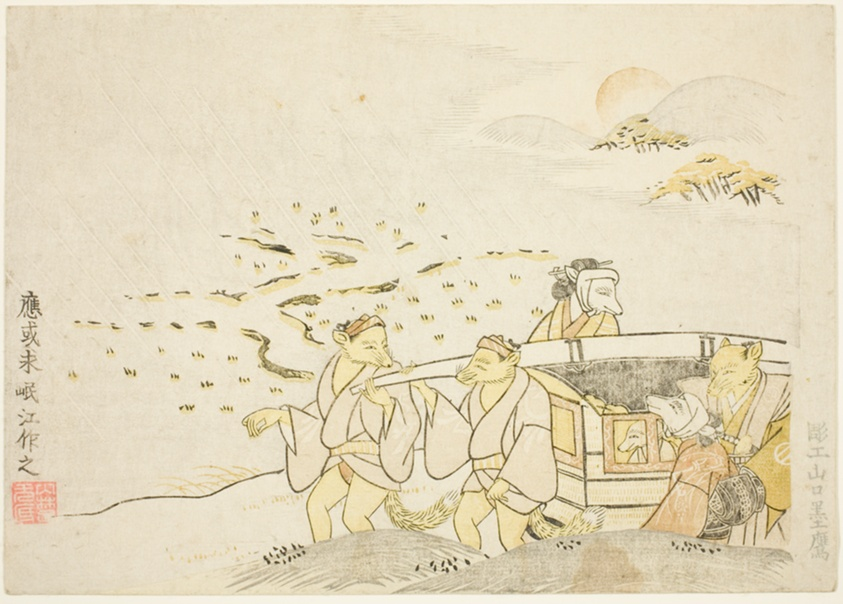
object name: Print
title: The Bride Traveling in the Rain, from the series "The Foxes' Wedding"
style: Japanese (culture or style)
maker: Tachibana Minko (Japanese, active c. 1764–72)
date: 1765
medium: Color woodblock print; chuban yoko-e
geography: Japan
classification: woodblock print; print; asian art